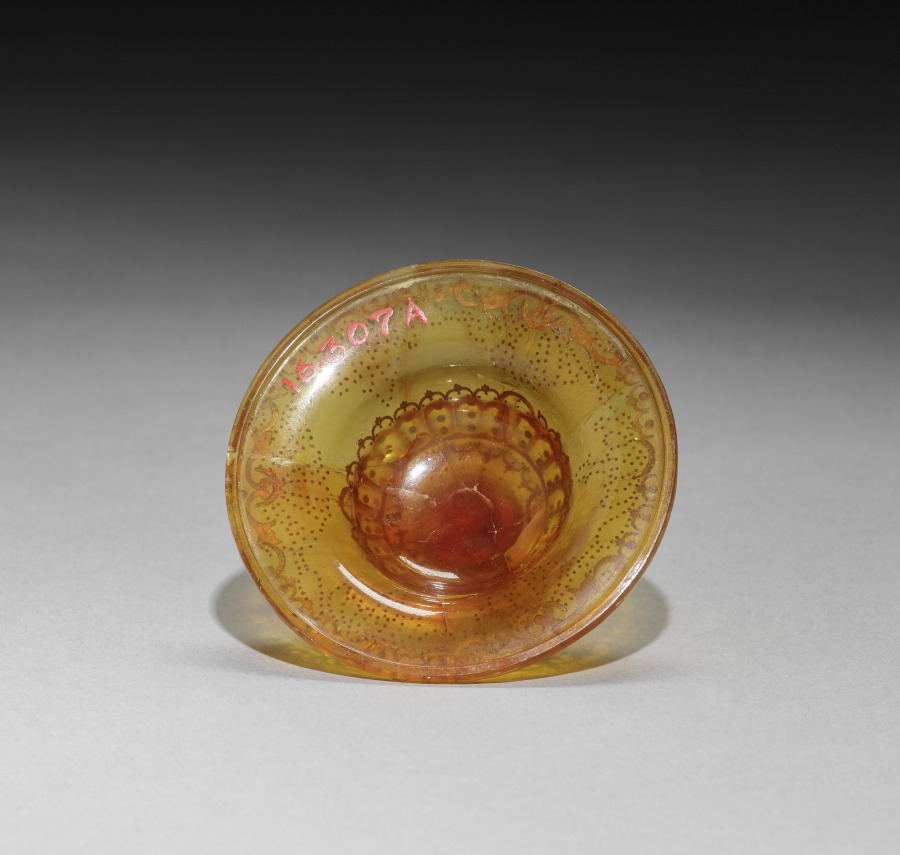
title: Cover for a Cup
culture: France, 18th century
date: c. 1730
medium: amber decorated with inlaid gold and mother-of-pearl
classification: Miscellaneous